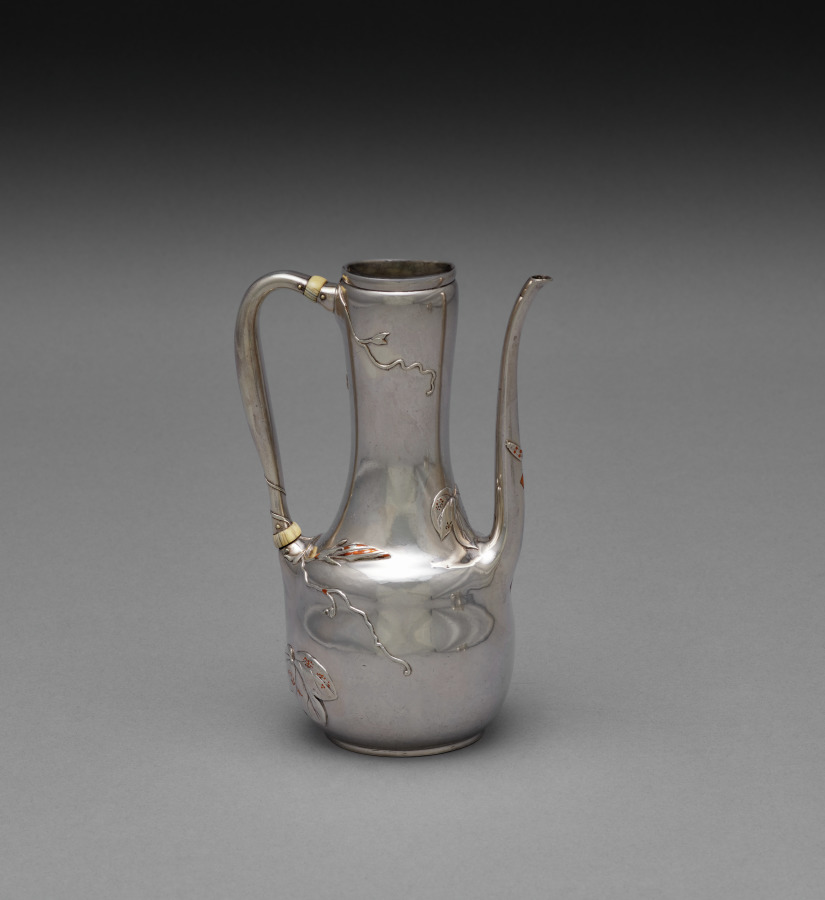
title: Coffee Pot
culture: America, New York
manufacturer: Tiffany & Co. (America, New York, est. 1837)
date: c. 1879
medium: silver inlaid with copper and gold, ivory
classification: Silver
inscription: engraved: E.J.W.B./from/A.M./Xmas 1879. (The A.M. may refer to Alfred Morrison, a wealthy man who supported contemporary decorative arts by collecting them for his London house.)